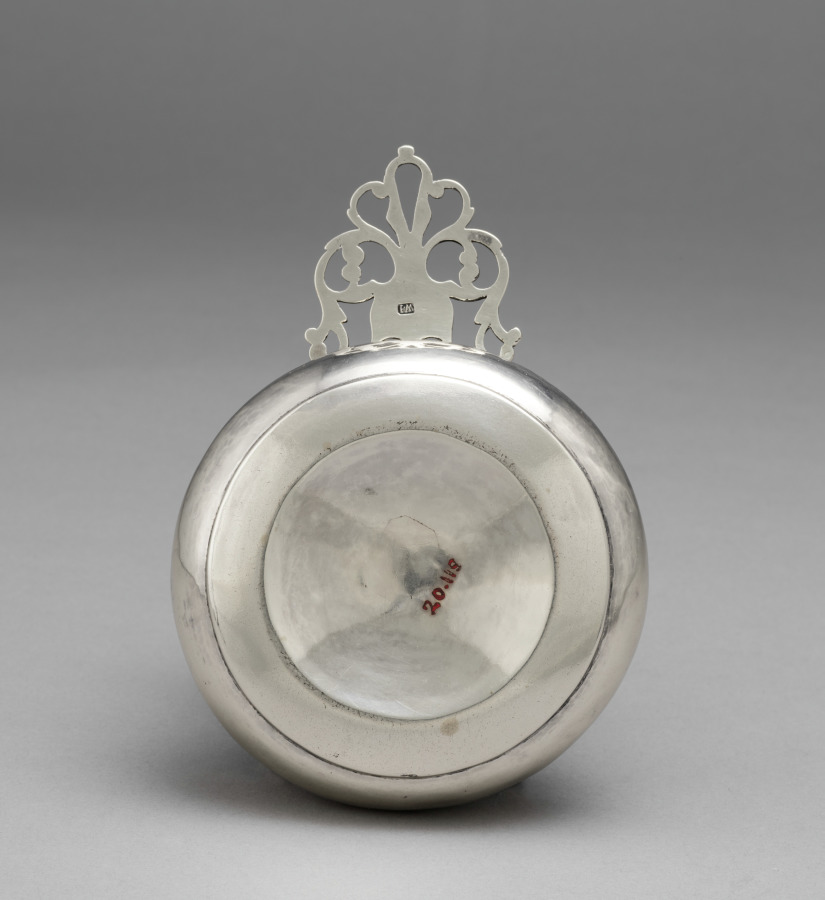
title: Porringer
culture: America, Massachusetts, Marblehead, 18th century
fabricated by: William Jones (American, 1694–1730)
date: 1725–1730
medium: silver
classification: Silver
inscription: engraved "D" over "H * A" in cross-hatched block initials on top of handle.